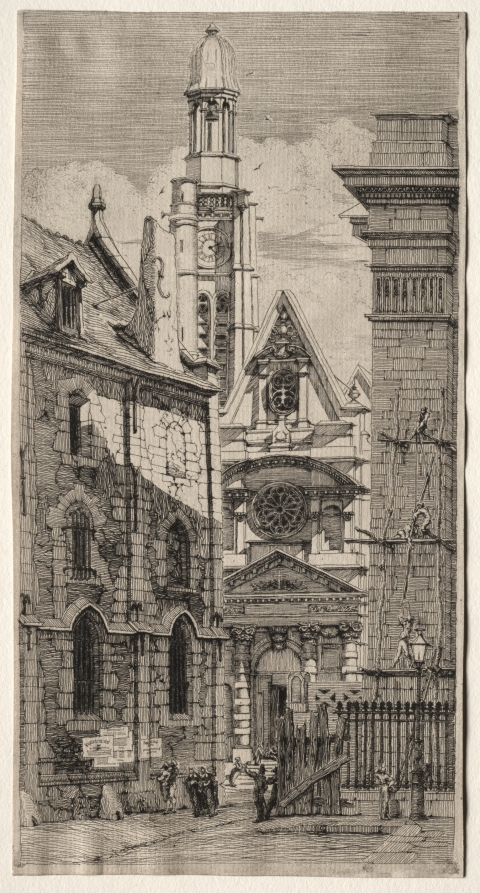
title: Etchings of Paris: Church of St. Stephen of the Mount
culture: France, 19th century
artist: Charles Meryon (French, 1821–1868)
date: 1852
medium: etching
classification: Print